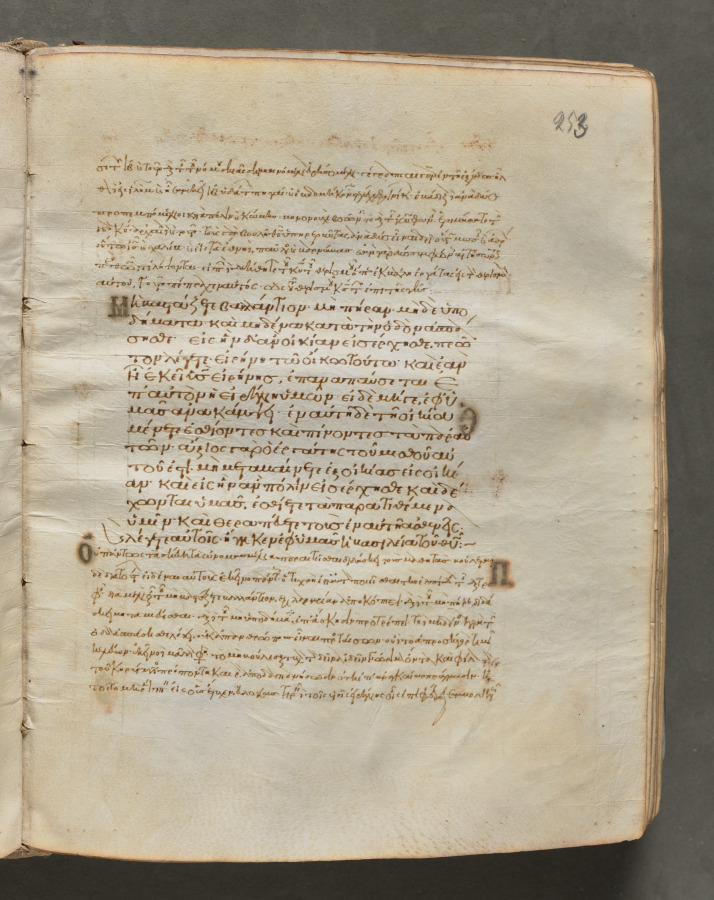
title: Text, folio 253 (recto), from a Gospel Book with Commentaries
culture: Byzantium, Constantinople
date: c. 1000–1100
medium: ink, tempera, and gold on vellum; leather binding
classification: Bound Volume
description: Each of the four gospels in this book opens on a page with brilliantly illuminated borders depicting the author of the text as well as birds—principally peacocks, symbols of the immortality of the soul—and fountains, representing the fountain of life and the salvation of the soul. This volume consists of 428 leaves with texts in Greek. Its level of sophistication suggests that it was probably written and decorated in a monastery in Constantinople.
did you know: Gospel books were carried in procession through Byzantine churches.